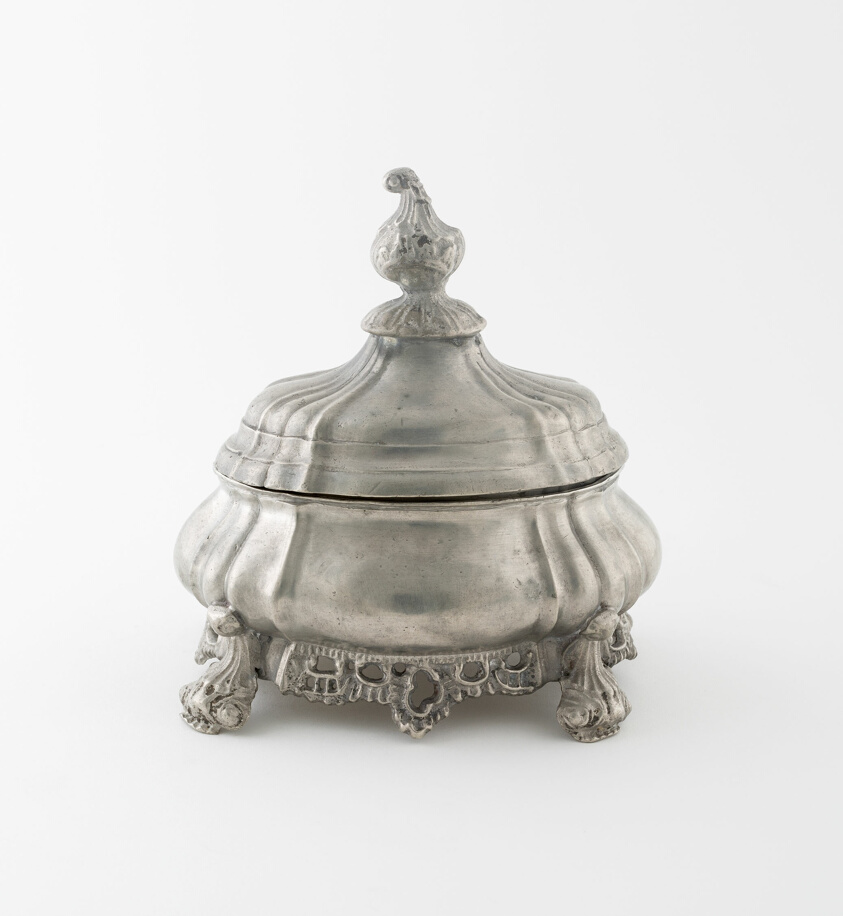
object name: Metalwork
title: Tobacco Box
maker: Netherlands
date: c. 1760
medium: Pewter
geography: Netherlands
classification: pewter; metalwork; european decorative arts